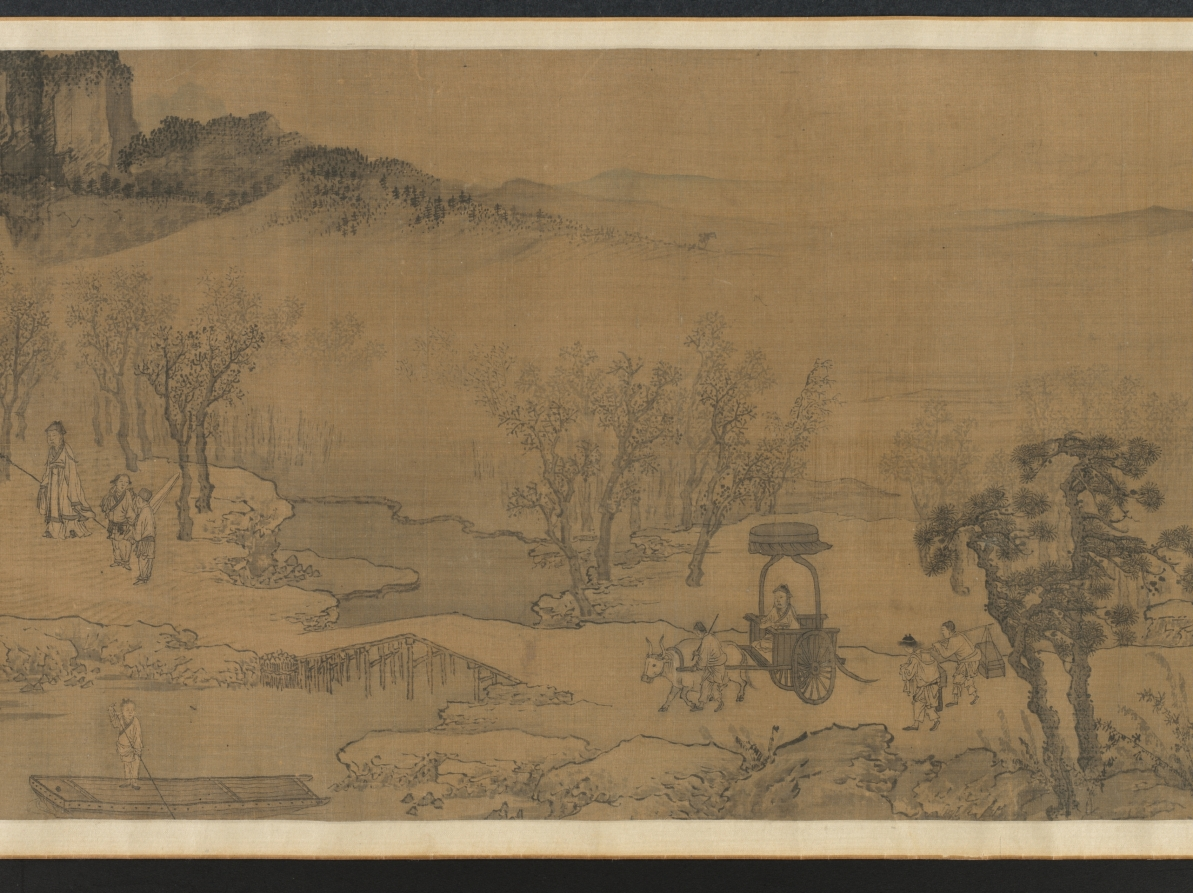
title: Tao Yuanming's Return Home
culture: China, Yuan dynasty (1271-1368)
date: 1300s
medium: Handscroll; ink and slight color on silk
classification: Painting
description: Tao Yuanming's revered poem "Return Home 歸去來辭 (Gui qu lai ci)" powerfully conveys his desire to leave bureaucratic life for the simplicity and authenticity of nature. This sentiment has deeply resonated with generations of Chinese scholars, making it a popular theme in paintings. This handscroll uses continuous narrative depicting Tao in multiple scenes from the poem. Starting on the right, the poet travels to his home. His children wait by the gate, while his wife pauses to tidy her hair before welcoming him. Then, free from the burdens of official service, Tao spends time in both nature and his cottage, where he can again enjoy wine, music, and books.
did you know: Poet Tao Yuanming 陶淵明 (c. 365–427 CE) returned to a secluded life instead of pursuing a civil service career.